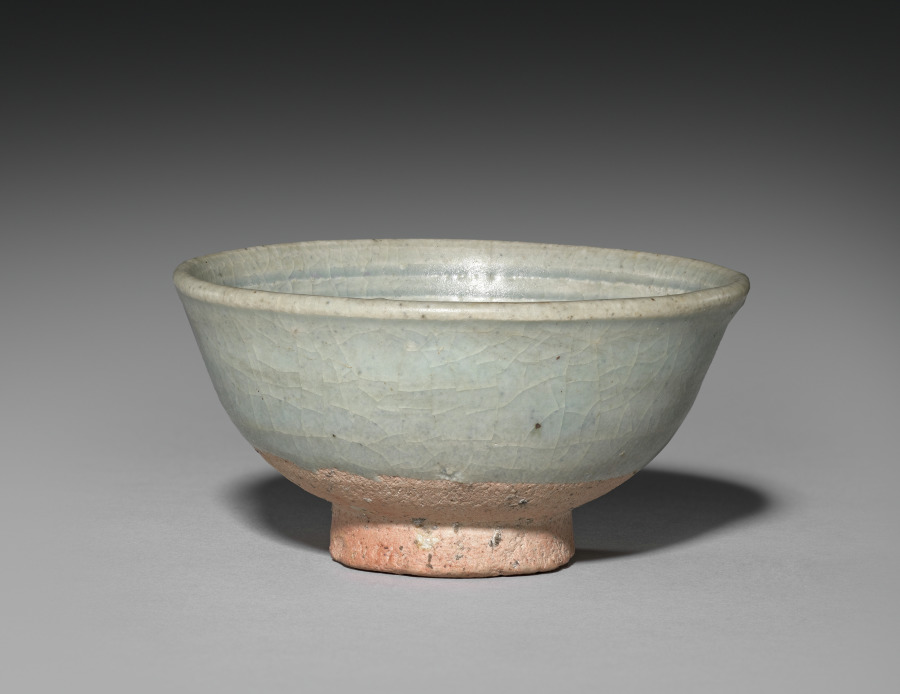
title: Bowl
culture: Siam, Sawankhalok ware, late 13th-14th Century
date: late 1200s-1300s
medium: stoneware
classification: Ceramic